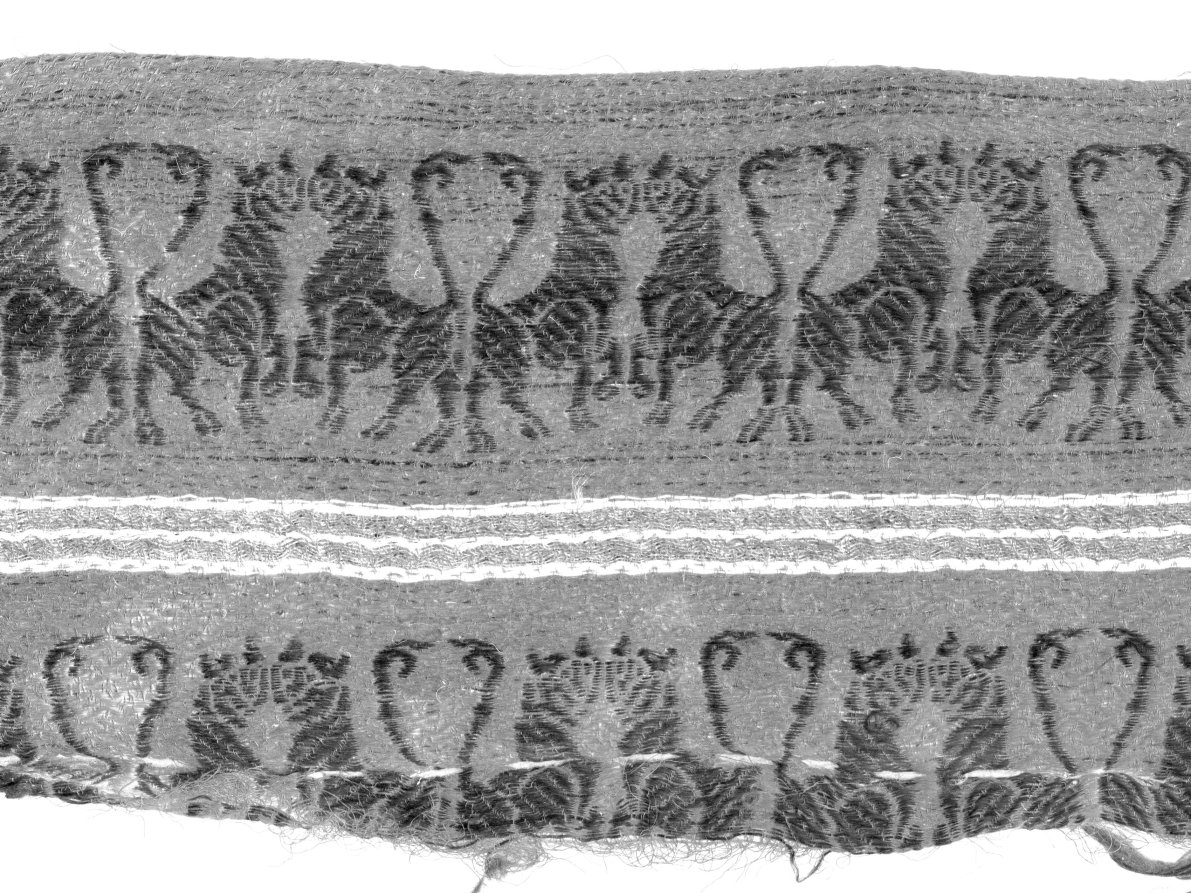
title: Reliquary bag with lions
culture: Spain, probably Almeria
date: late 1100s-1300s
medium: cloth d’areste, weft-faced lozenge twill variant: silk and gold thread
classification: Textile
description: This bag was originally inside of the portable altar commissioned by Countess Gertrude of Brunswick, one of the Guelph Treasure’s earliest and most sumptuous objects.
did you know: This silk bag originally held bits of mummified flesh or tissue which was labeled as being from Saint Bartholomew.